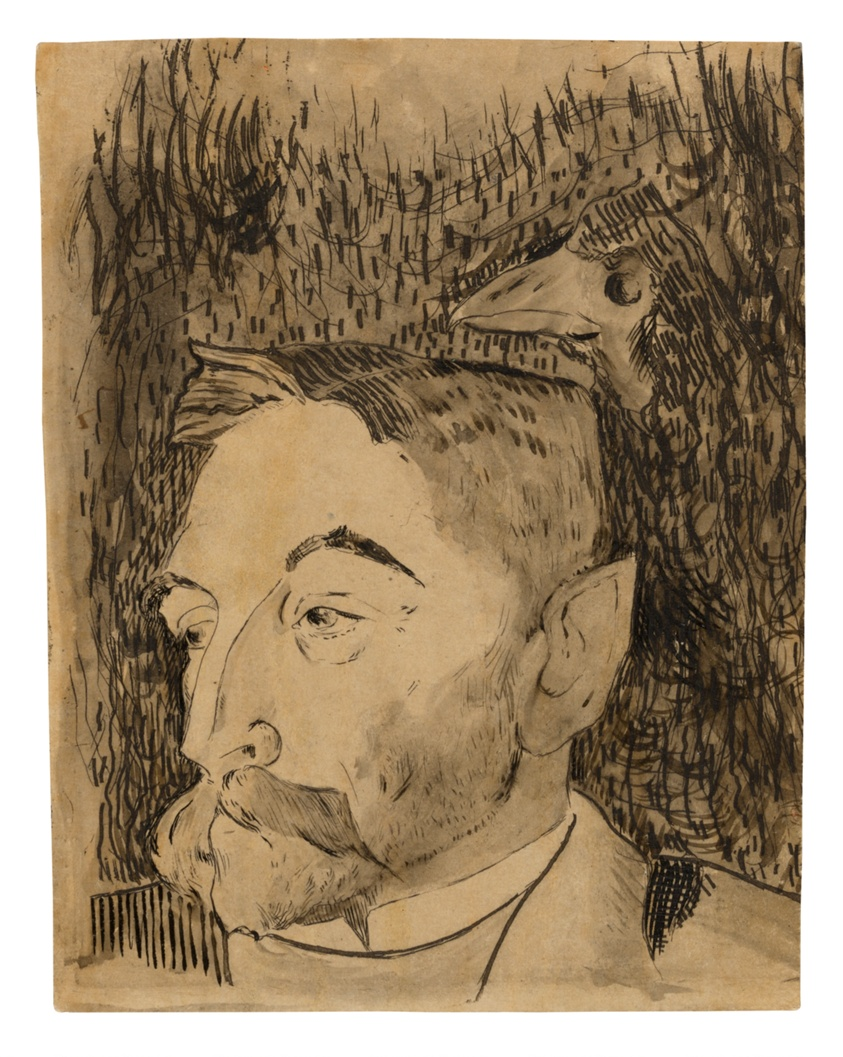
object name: Print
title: Portrait of Stéphane Mallarmé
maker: Paul Gauguin (French, 1848-1903)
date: 1891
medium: Etching, with drypoint and engraving, in black, with pen and black and brown ink, and brush and black and gray wash, on cream wove paper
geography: France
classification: etching; print; prints and drawing